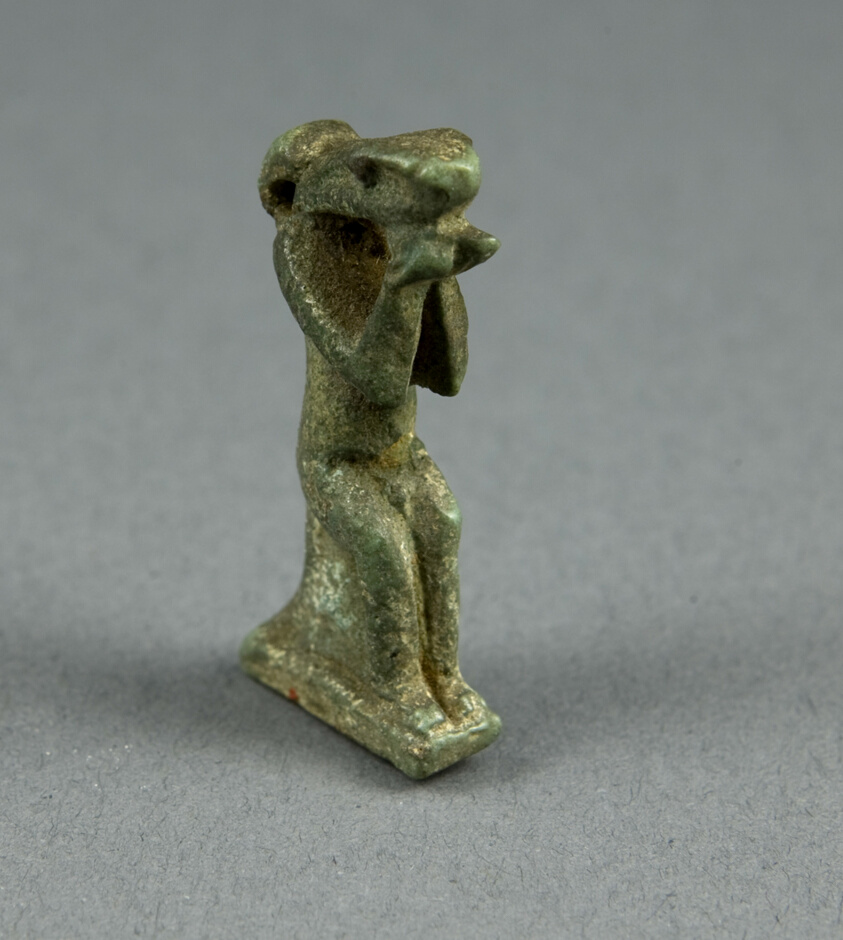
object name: Costume and Accessories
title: Amulet of the God Nehebkau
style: third intermediate period, egyptian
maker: Egyptian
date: Third Intermediate Period, Dynasty 21–25 (1070–656 BCE)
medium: Faience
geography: Egypt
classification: amulet; jewelry; ceramics; ancient art; costume; faïence (composite material)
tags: gods (deities)